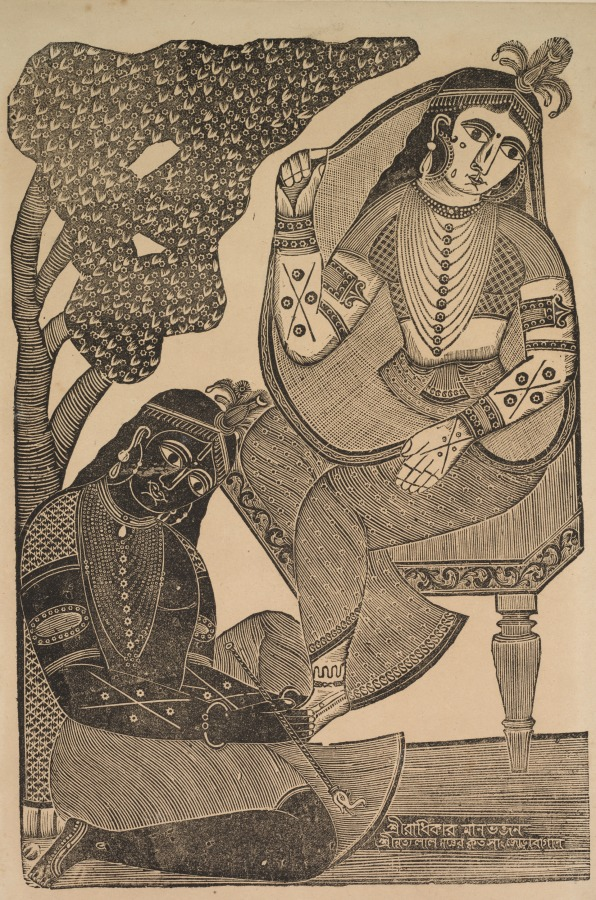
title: Krishna Stroking Radha's Feet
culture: Eastern India, Bengal, Kolkata, Kalighat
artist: Shri Gobinda Chandra Roy (Indian, active late 1800s)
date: c. 1890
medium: woodcut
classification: Print